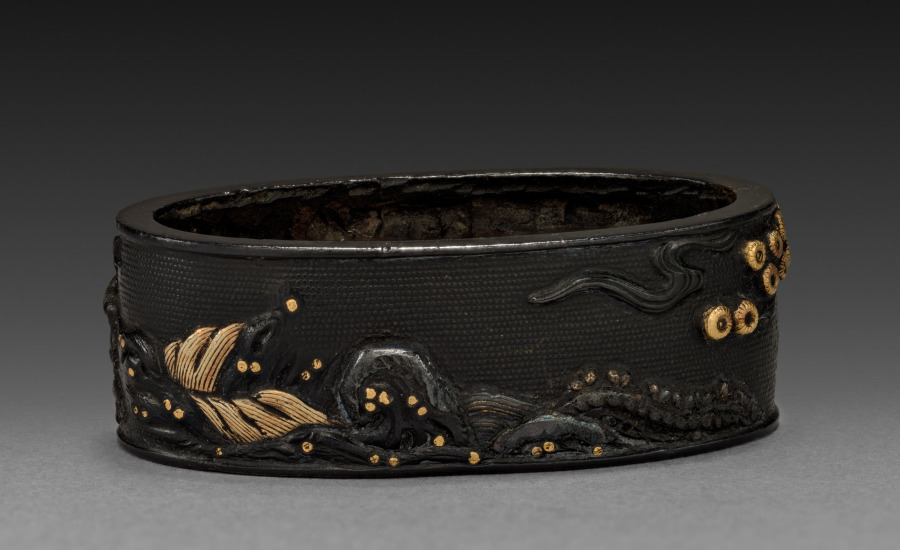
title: Sword-Hilt Collar (Fuchi)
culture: Japan, Edo period (1615–1868)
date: 1700–1850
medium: shakudo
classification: Arms and Armor